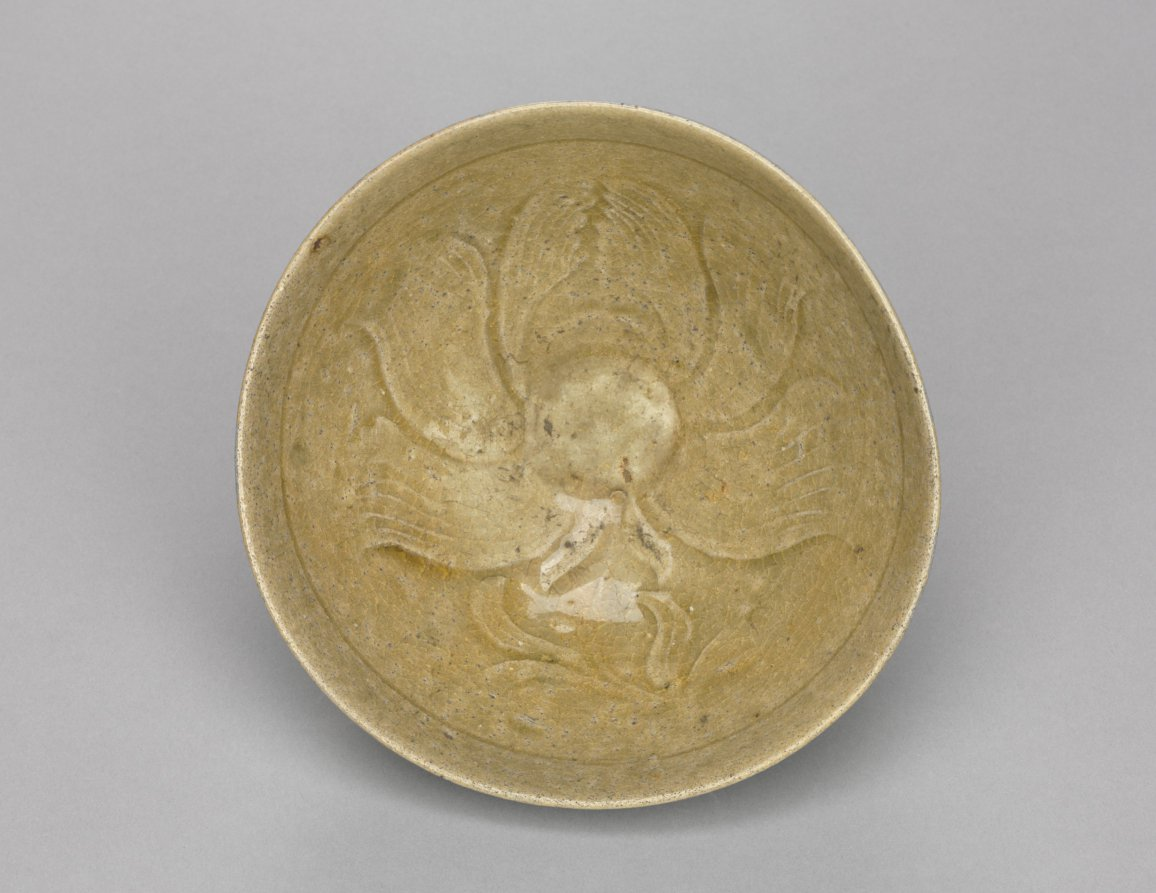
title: Bowl with Peony Design in Relief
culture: Korea, Goryeo dynasty (918–1392)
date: 1200s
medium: pottery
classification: Ceramic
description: As early as the 600s, the practice of drinking tea and wine became an important part of elite leisure culture in Korea. A wide bowl like this example was especially suitable for drinking powdered tea shaved from a compressed tea cake, the most commonly enjoyed type during the Goryeo period. A large bloomed peony in relief on the inside of this tea bowl may have made the moment of drinking tea more enjoyable.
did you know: Kangjin and Buan kilns in Jeolla province were the two major production centers for celadon wares during the Goryeo period (918-1392).